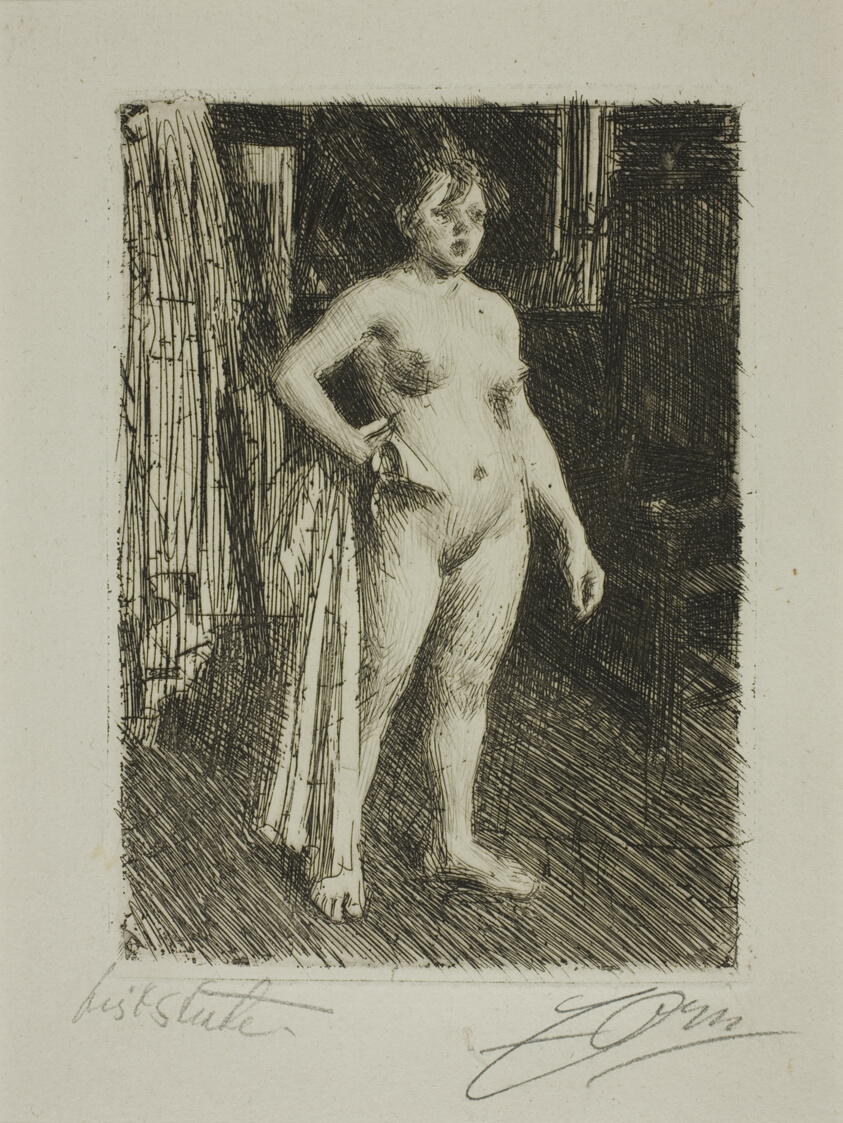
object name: Print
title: Venus de la Villette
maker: Anders Zorn (Swedish, 1860-1920)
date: 1893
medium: Etching on ivory laid paper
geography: Sweden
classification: etching; print; prints and drawing